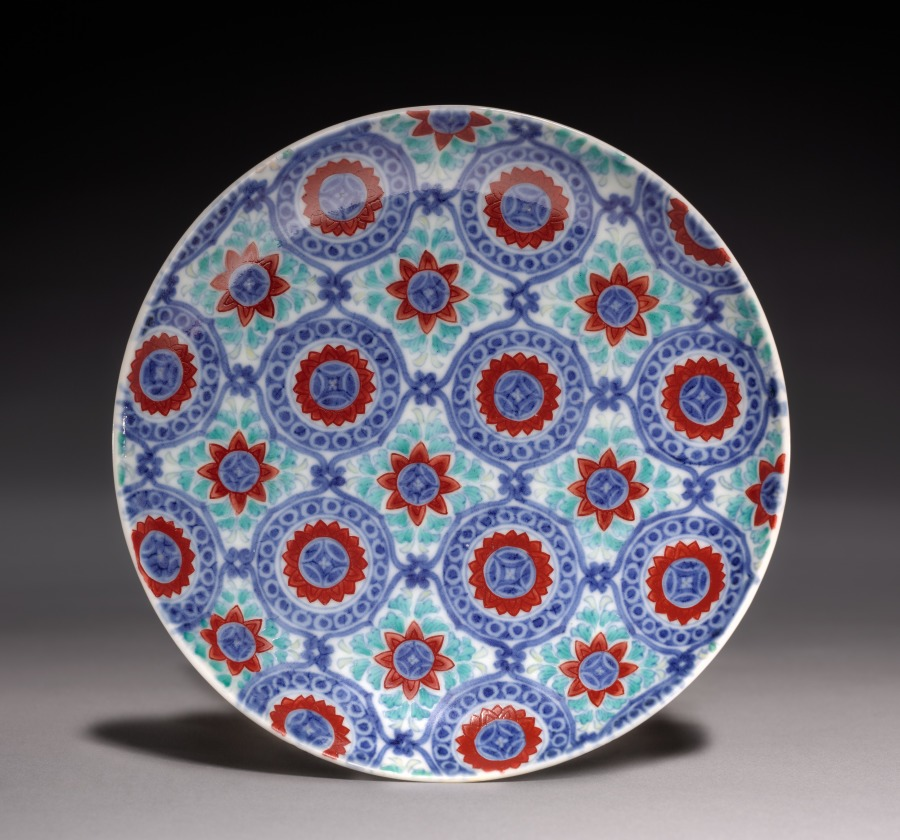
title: Dish with Brocade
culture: Japan, Edo period (1615–1868)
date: late 1600s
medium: Porcelain with underglaze blue and overglaze enamel (Hizen ware, Nabeshima type)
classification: Ceramic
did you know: Designs on Nabeshima ware, like this dish, were often inspired by Japanese textiles.